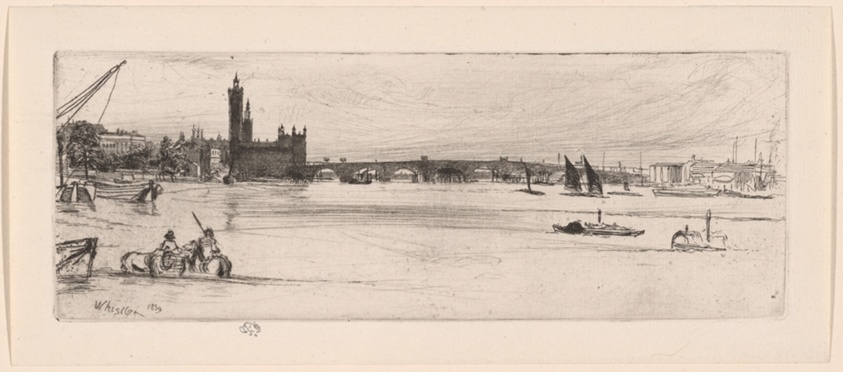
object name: Print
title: Old Westminster Bridge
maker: James McNeill Whistler (American, 1834-1903)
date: 1859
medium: Etching and drypoint in black ink on ivory laid paper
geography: United States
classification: etching; print; prints and drawing; paper; drypoint